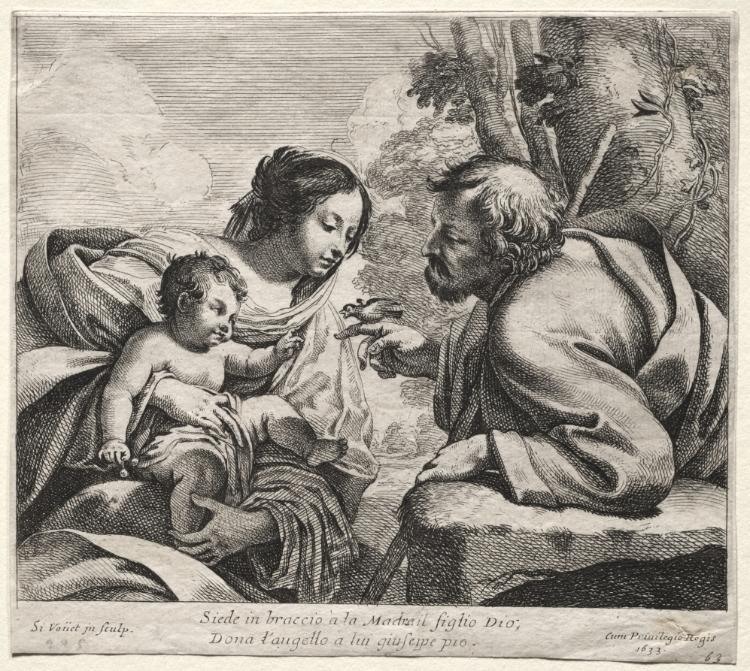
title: Holy Family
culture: France, 17th century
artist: Simon Vouet (French, 1590–1649)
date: 1633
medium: etching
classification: Print